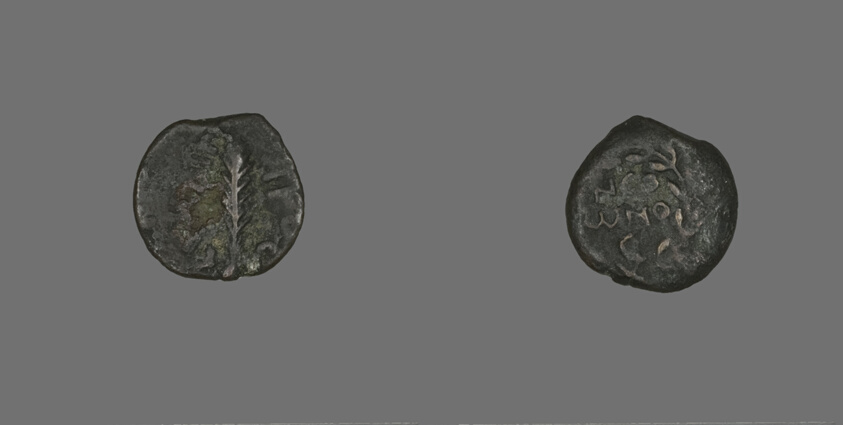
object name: Coin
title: Obv: Legend within a Wreath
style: roman (ancient, style or period), ancient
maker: Roman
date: 58-59, minted under Procurator Antonius Felix (Nero's reign)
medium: Bronze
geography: Israel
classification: coin; ancient art